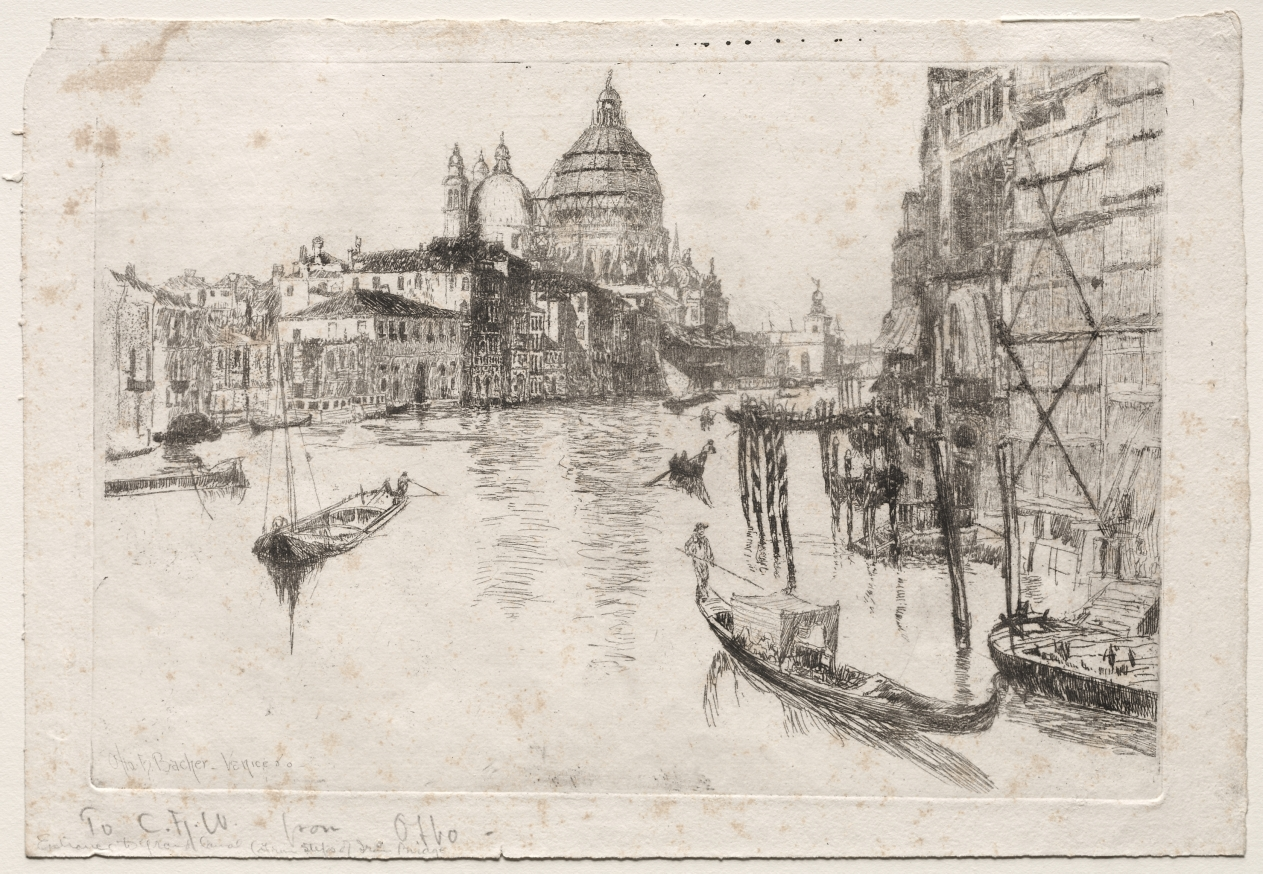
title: Entrance to Grand Canal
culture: America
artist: Otto H. Bacher (American, 1856–1909)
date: 1880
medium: etching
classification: Print